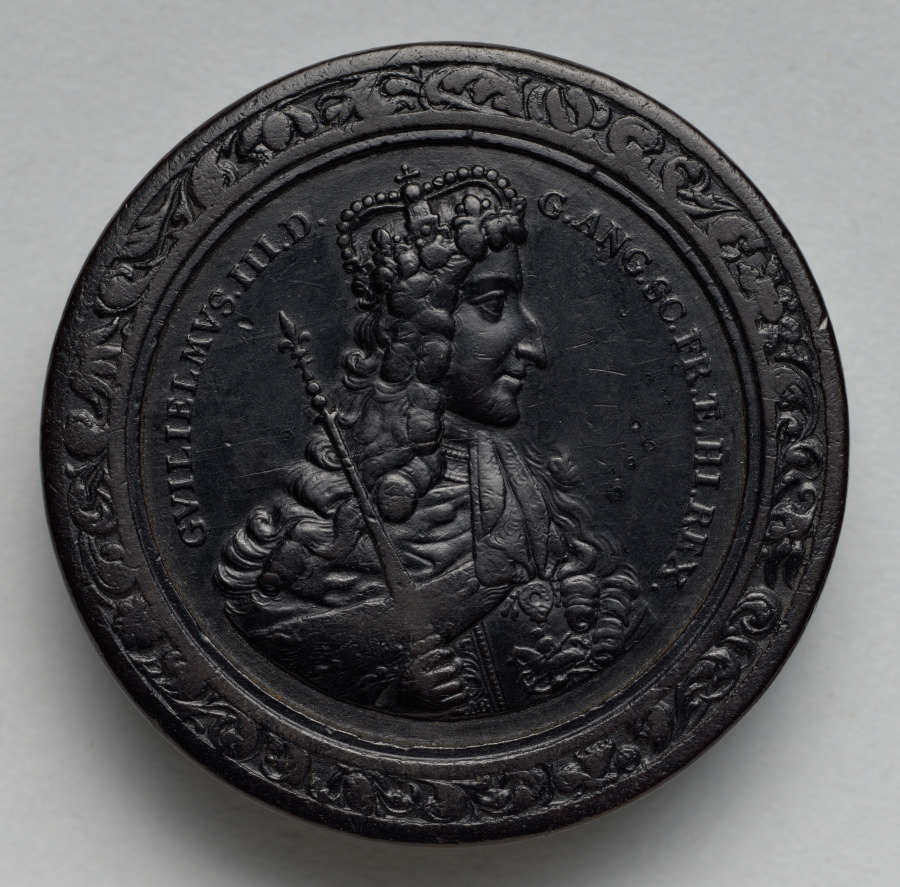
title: Gaming Piece (obverse)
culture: Germany, late 17th-early 18th Century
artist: Martin Brunner (German, 1659–1725)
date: c.1700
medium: wood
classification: Furniture and woodwork